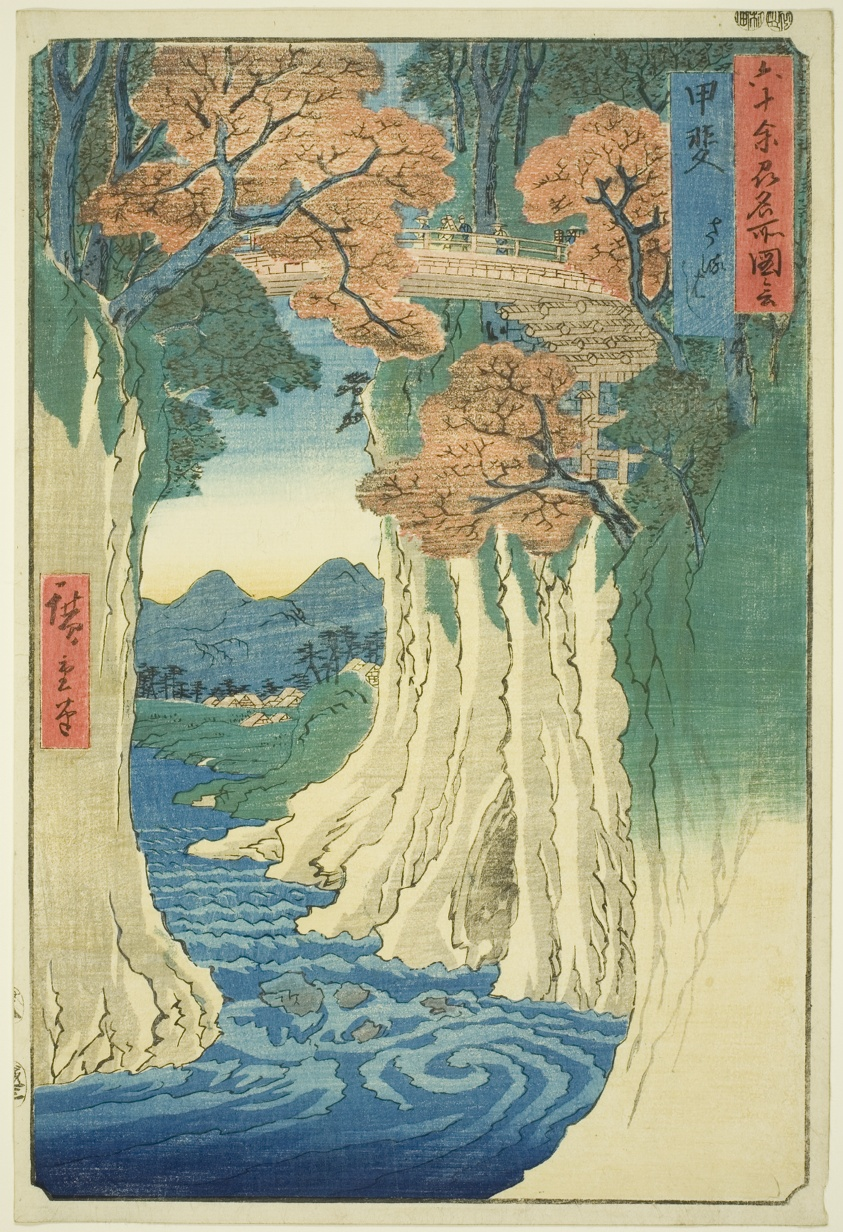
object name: Print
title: Kai Province: Monkey Bridge (Kai, Saruhashi), from the series "Famous Places in the Sixty-odd Provinces (Rokujuyoshu meisho zue)"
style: Japanese (culture or style)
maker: Utagawa Hiroshige 歌川 広重; Japanese, 1797-1858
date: 1853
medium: Color woodblock print; oban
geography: Japan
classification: woodblock print; print; asian art